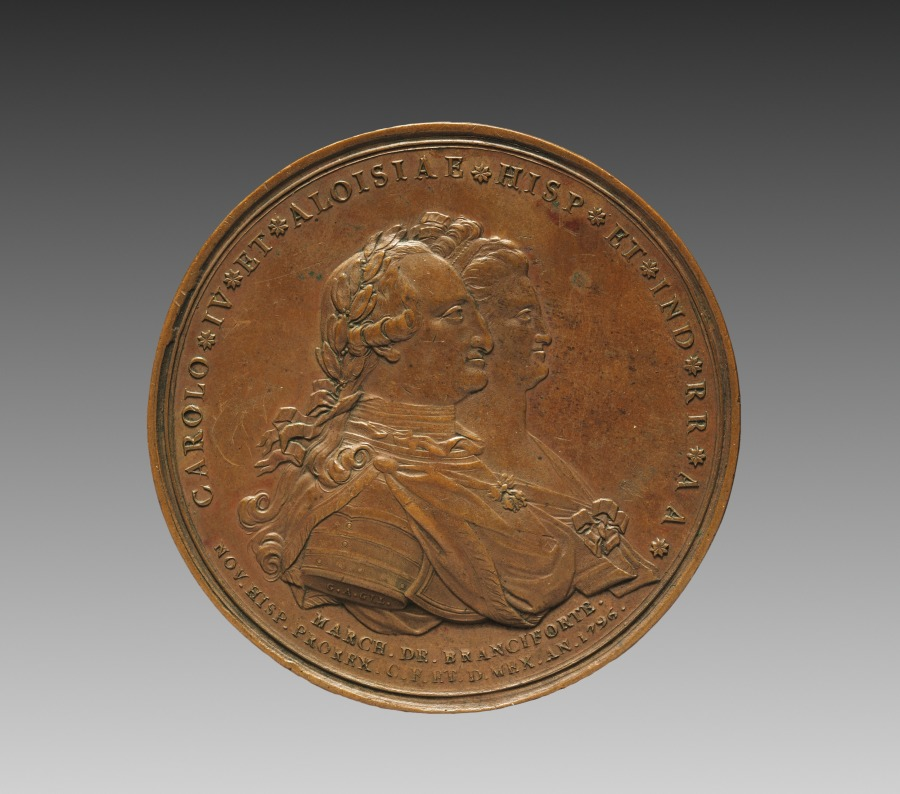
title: Portrait of Charles IV, King of Spain, and María Luisa, Queen Consort of Charles IV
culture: Spain, late 18th century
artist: Manuel Tolsá (Spanish, 1757–1816)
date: 1796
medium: bronze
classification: Sculpture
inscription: "CAROLO IV ET ALOISIA HISP. ET. IND. A.A. MARCE DE FRANCIFORTE. NOV. HISP. PROREX. C.F. ET D. MEX. AN 1796."